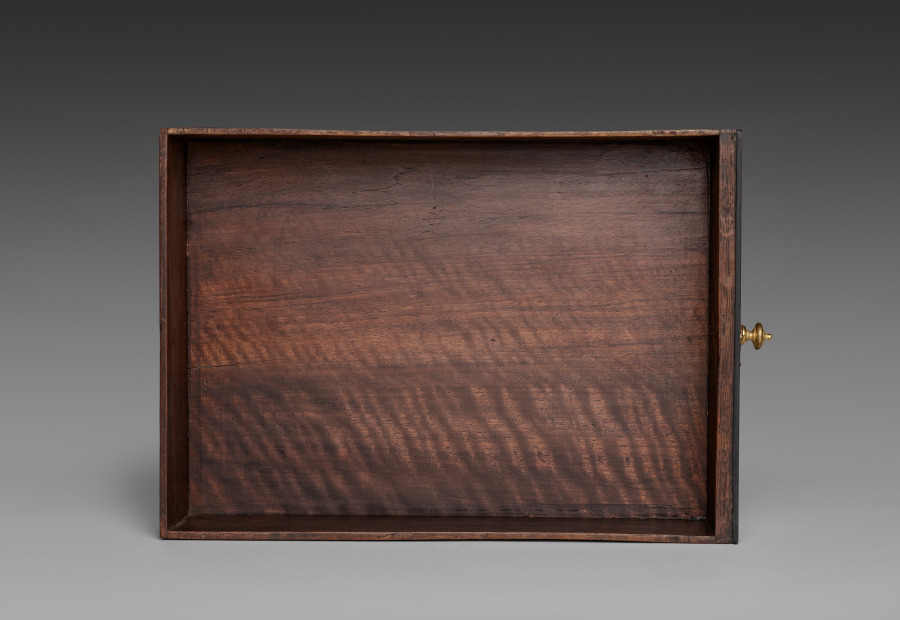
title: Interior Drawer for Cabinet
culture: France, late 17th Century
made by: André-Charles Boulle (French, 1642–1732)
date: c. 1690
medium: ebony, marquetry in metal and tortoiseshell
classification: Furniture and woodwork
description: Appointed cabinetmaker to King Louis XIV in 1672, André-Charles Boulle became a master of furniture making in France during the late 1600s until his death in 1732. Known primarily for his use of marquetry, in which metal patterns are inlaid into tortoiseshell then applied within the veneered surface of the furniture, Boulle established a level of quality and craftsmanship few others could achieve. As a result, his work found favor at the royal court and among other aristocrats and diplomats eager to impress the king. The inclusion of a medallion depicting Louis XIV within the bronze decoration of this chest would have identified the owner with the royal court. Often exhibiting stout architectural proportions with elegant groups of inlaid motifs such as the parrot on the central panel of this chest, Boulle’s designs are an example of the intellectual fashion for contrasting ideas, materials, and motifs.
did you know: Originally designed to sit atop an elaborate tall stand, this chest was likely altered in the late 1700s to reduce its scale and height.